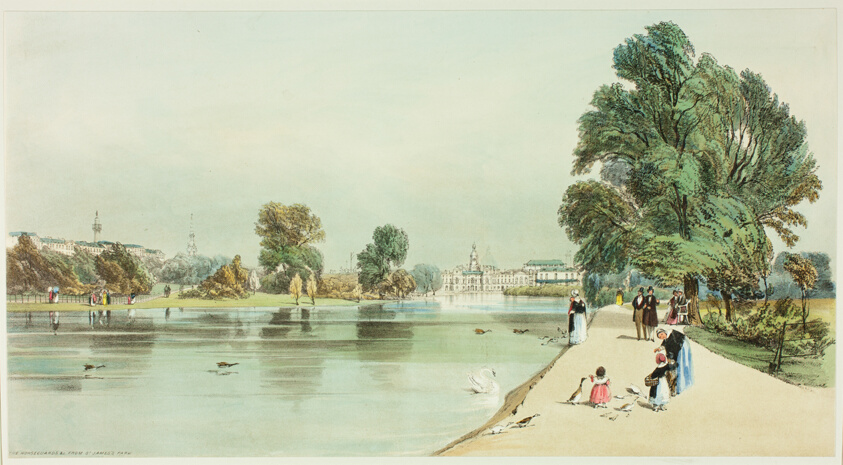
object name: Print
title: The Horseguards from St. James's Park, plate fourteen from Original Views of London as It Is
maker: Thomas Shotter Boys (English, 1803-1874); designed by Charles Ollier (English, 1788-1859)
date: 1842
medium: Hand-colored lithograph on paper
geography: England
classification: lithograph; print; prints and drawing